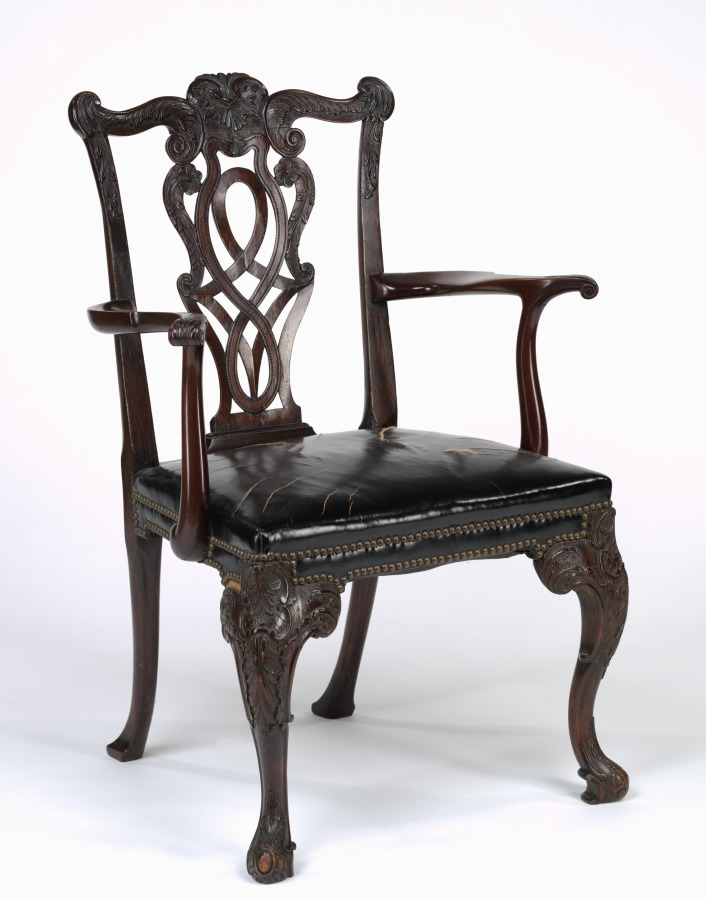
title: Armchair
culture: America, New York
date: c. 1875–80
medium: mahogany, leather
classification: Furniture and woodwork